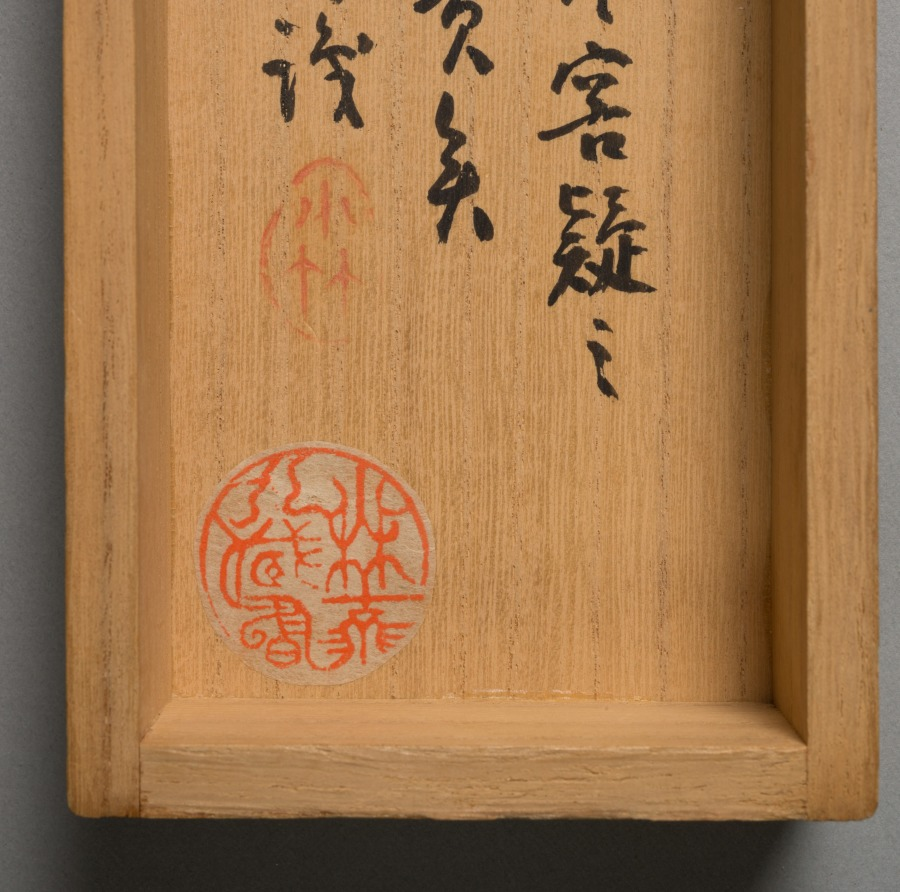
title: Landscape with Boaters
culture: Japan, Edo period (1615–1868)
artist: Kimura Kenkadō (Japanese, 1736–1802)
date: late 1700s–early 1800s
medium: hanging scroll; ink and slight color on paper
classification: Painting